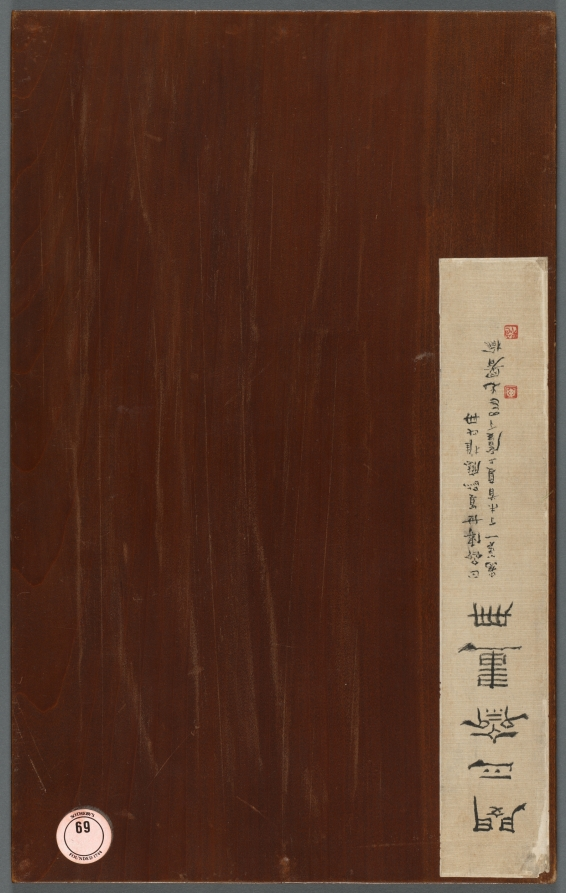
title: Album of Miscellaneous Subjects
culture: China, Qing dynasty (1644-1911)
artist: Min Zhen (Chinese, 1730–after 1788)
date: 1788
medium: Album of twelve leaves; ink on paper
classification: Painting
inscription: 予素有怪石之僻。余友戴笠山人嗜予畫，亦猶予之嗜怪石焉。向故訂約，以所好相易。值余奔馳遷延，今夏偶憶及怪石之在吾齋已五載。繪此以踐前言。誌以奇峭為十二冊之終。時戊申六月六日，正齋閔貞謹識。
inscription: Six seals appearing on the leaves: Min Zhen 閔貞; Zheng zhai 正齋; Qingqiao 青橋; Zhen 貞; Liao tang 蓼塘; Min Zhen zhi yin 閔貞之印。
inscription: 正齋傳世真跡，應推此冊為第一。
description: Min Zhen, who was orphaned at age 12 and developed an eccentric personality, was trained by Tang Yin (1682–1756), a writer, playwright, and superintendent of the imperial porcelain workshops in Jingdezhen. The connection to him may have enabled Min to stay in Beijing for a decade from around 1773. It is not clear whether he ever resided in Yangzhou, but his style is in many instances reminiscent of that of Yangzhou artist Huang Shen. This album demonstrates Min’s versatility and mature style in the last years of his life.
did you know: This album was painted for his friend Dailili Shanren in exchange for a scholar’s stone.